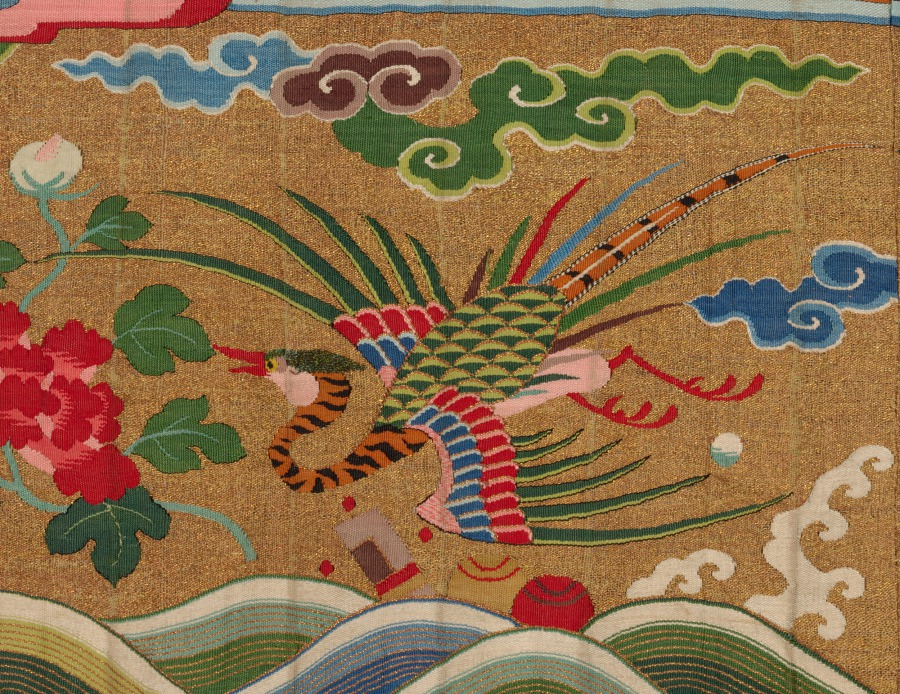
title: Strip of Silk Tapestry (Kesi)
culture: China, Qing dynasty (1644–1911)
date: 1700s–1800s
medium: Silk and gold thread; tapestry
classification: Tapestry